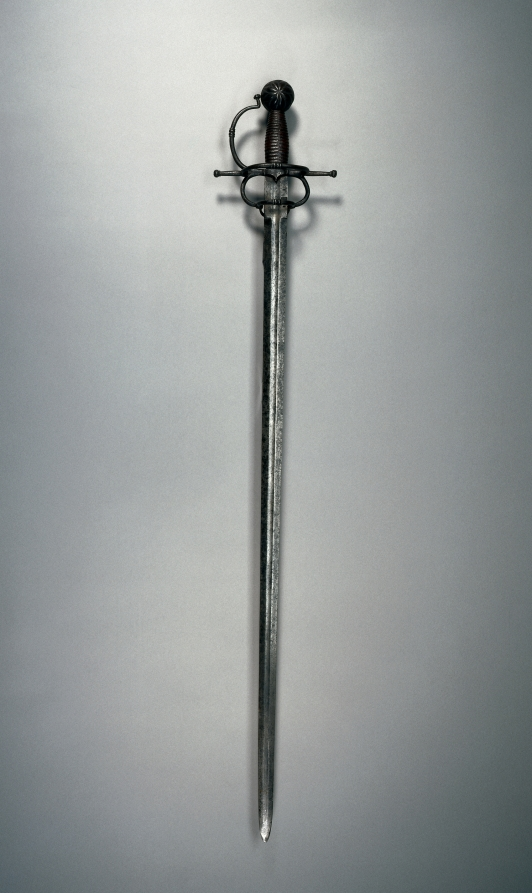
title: Sword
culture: Italy, 16th century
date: c.1550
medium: steel, hilt russetted, leather grip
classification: Arms and Armor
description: The hilt of this sword is russeted, a decorative technique popular in France and England that imparts a brownish color to the surface of the metal. It was achieved by a chemical process that involved treating the steel surface with a mild corrosive medium. As an added benefit the process also helps protect against rust.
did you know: There are three unidentified marks inlaid on the ricasso or the unsharpened blade just above the guard.